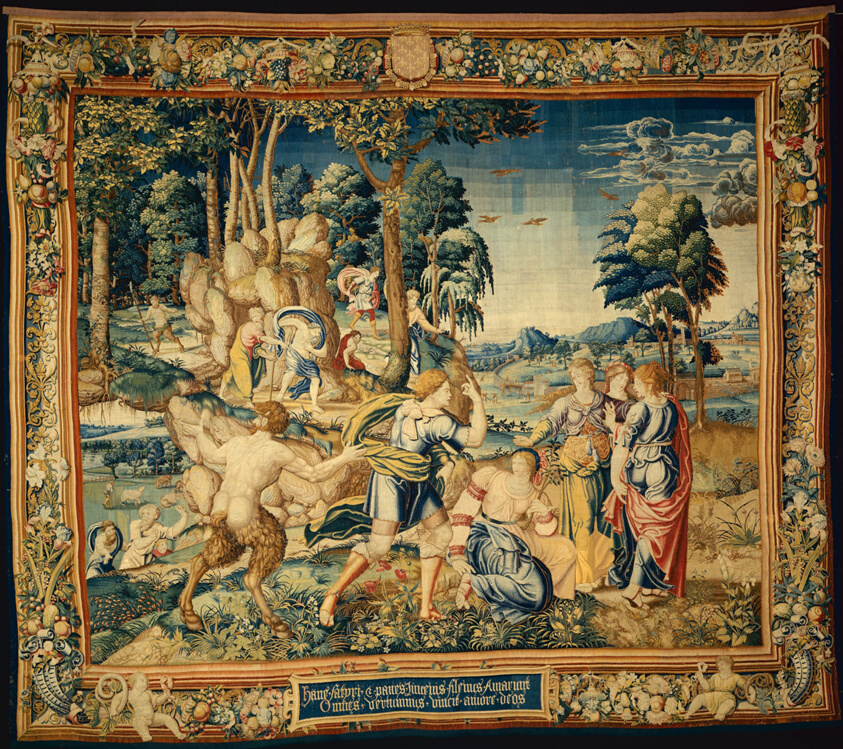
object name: Textile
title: Pomona Surprised by Vertumnus and Other Suitors, from The Story of Vertumnus and Pomona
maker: After a design by an unidentified Flemish artist; Flanders, Brussels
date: 1535/40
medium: Wool and silk, slit and double interlocking tapestry weave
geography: Brussels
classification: weaving - tapestry; textile